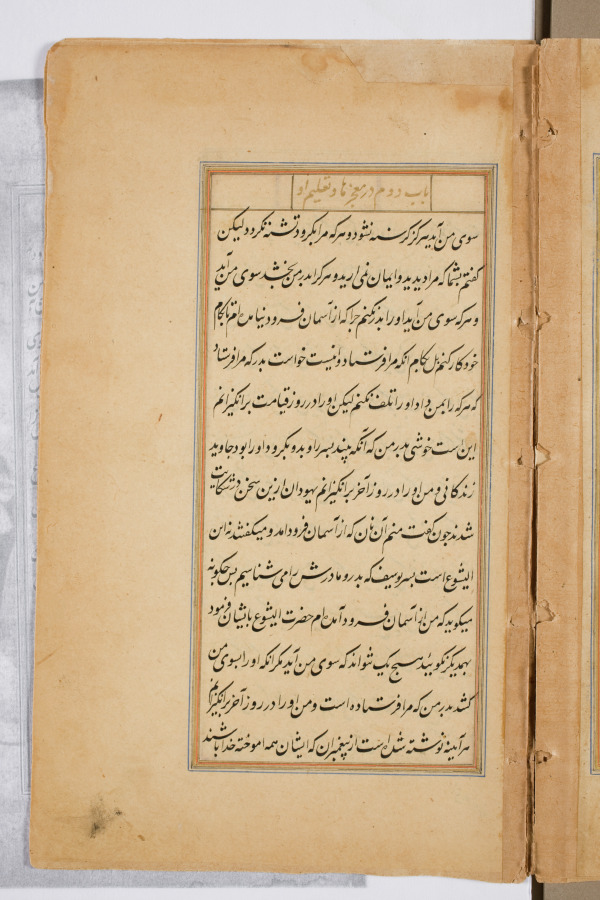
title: Text page from a Mirror of Holiness (Mir’at al-quds) of Father Jerome Xavier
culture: Mughal India, Allahabad, made for Prince Salim (1569–1627)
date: 1602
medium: Ink and gold on paper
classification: Manuscript